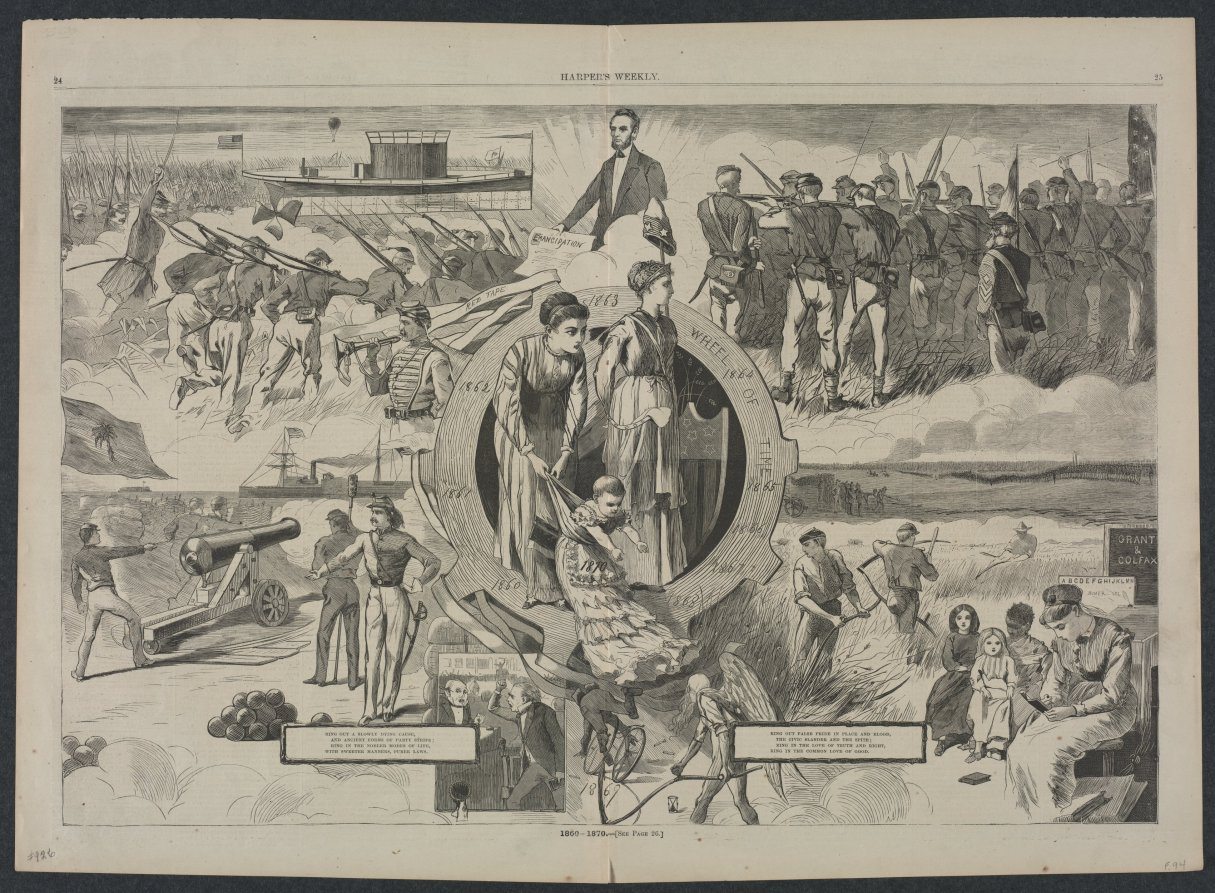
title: 1860 - 1870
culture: America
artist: Winslow Homer (American, 1836–1910)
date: 1870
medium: wood engraving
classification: Print